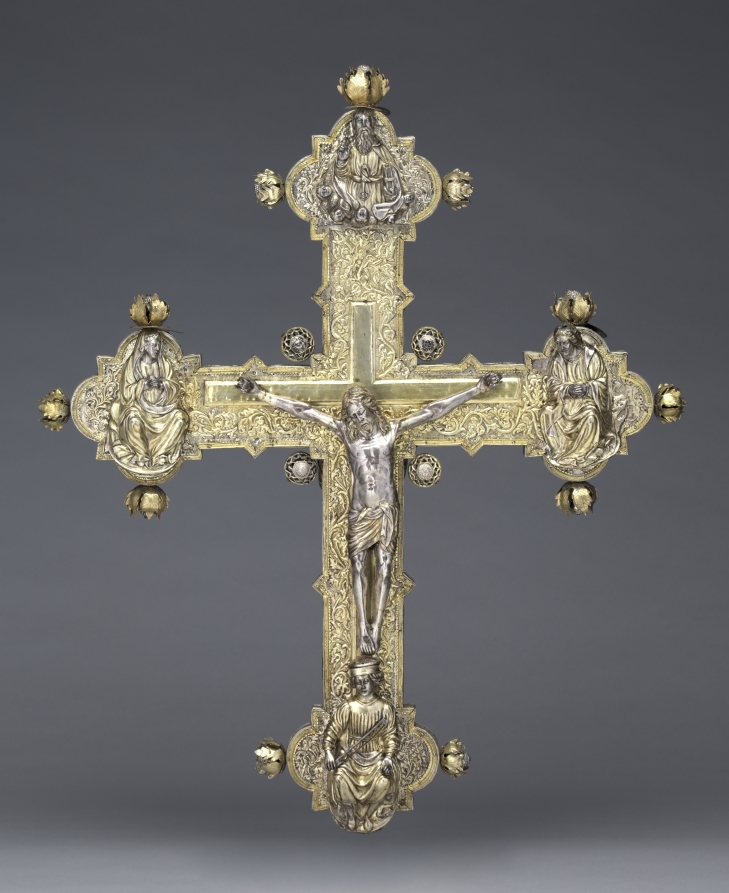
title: Processional Cross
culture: Italy, The Marches, 15th century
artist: Pietro Vannini (Italian, 1413/14–1495/96)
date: c. 1440–50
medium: silver, gilt-silver, and repoussé, over wood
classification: Metalwork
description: This remarkable object, meant to be carried in religious processions within a great church, is an example of the high level of skill achieved by 15th-century Italian silversmiths. The cross was made from hammered, chased, and gilded sheets of silver attached to a wooden core. The figures are made in repoussé, a technique of hammering the silver from beneath to create a design. On the front of the cross is the figure of Christ flanked by the seated Virgin and Saint John, with God the Father blessing from above. The back of the cross includes the figure of Christ in Majesty at the center, with the Evangelists at the end of each arm.